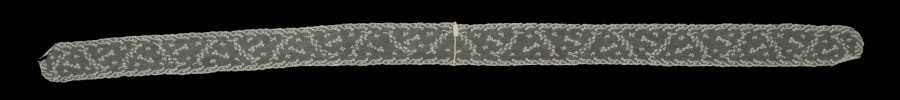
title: Lace Lappet (in two parts)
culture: France, Valenciennes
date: 1780s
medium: Bobbin lace (Valenciennes)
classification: Lace